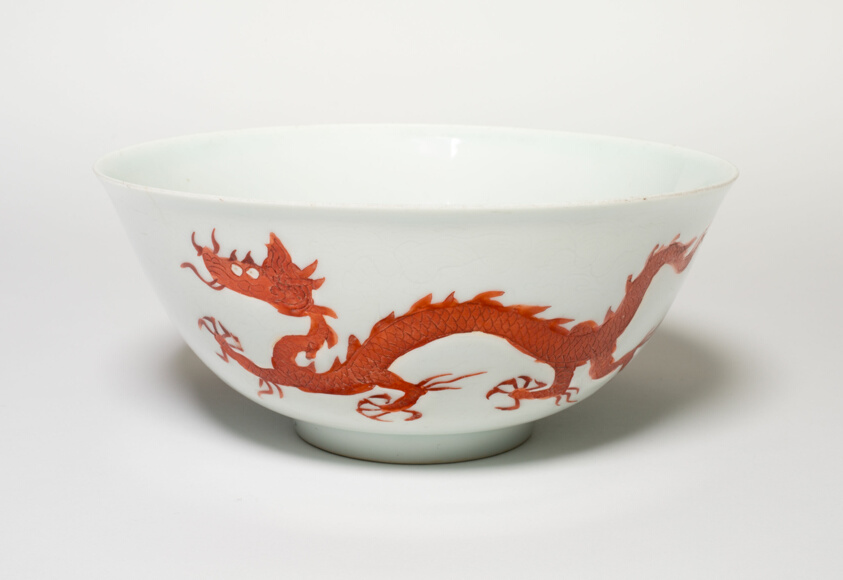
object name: Vessel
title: Bowl with Dragons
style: Chinese (culture or style)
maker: China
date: Ming dynasty (1368–1644), Hongzhi period (1488–1505)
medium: Porcelain with red enamel (turquoise later added to interior)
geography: China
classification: bowl; porcelain; dish (vessel); ceramics; asian art; vessel